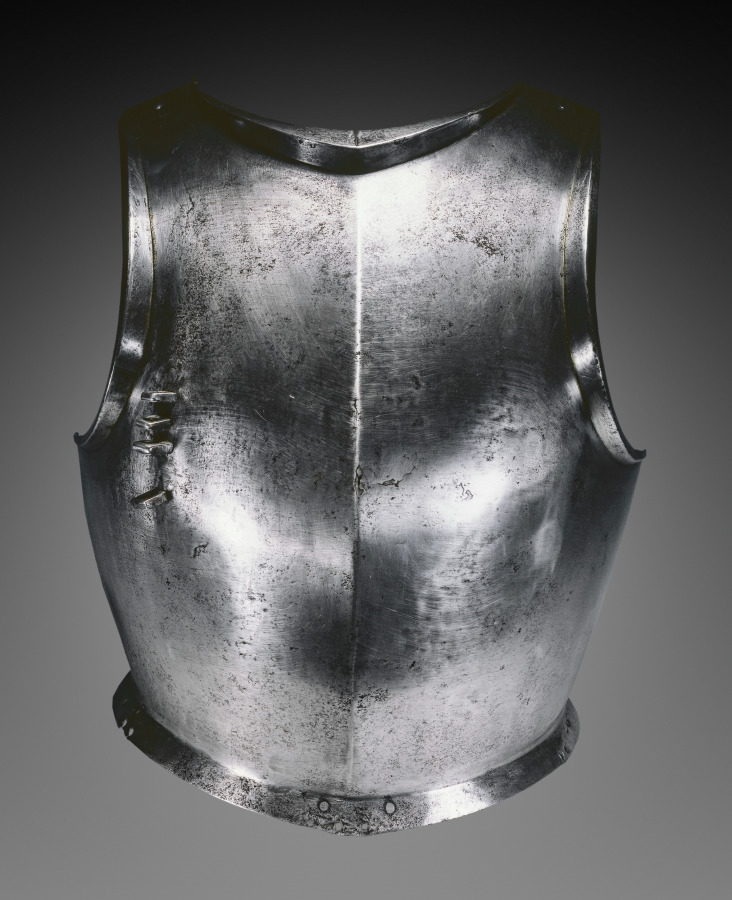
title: Gothic Breastplate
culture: Italy, late 15th Century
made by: possibly by Domenico dei Barini (Italian, 1492-c. 1516)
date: c. 1490–1500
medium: steel (with Lance Rest Mount)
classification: Arms and Armor